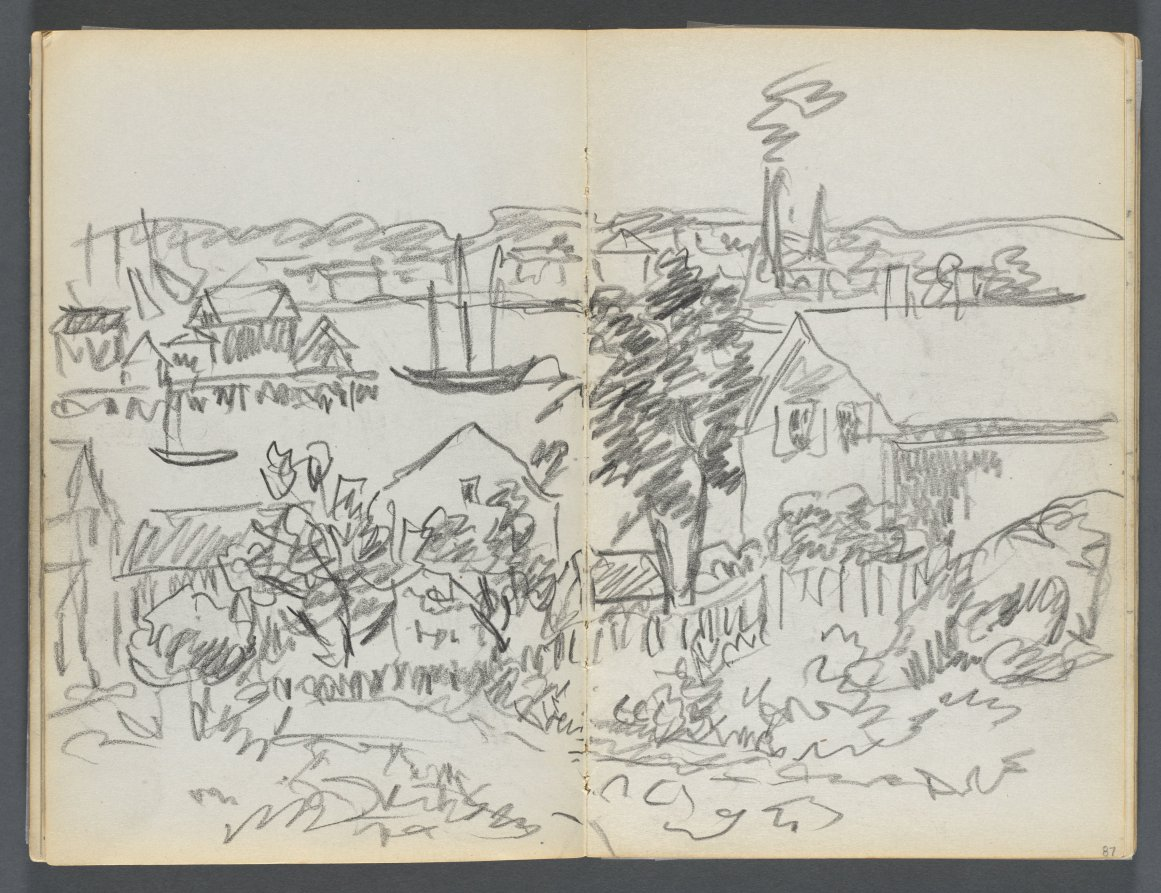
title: Sketchbook, The Dells, N° 127, page 086 & 87: Harbor View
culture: America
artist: Maurice Prendergast (American, born Newfoundland [now Canada], 1858–1924)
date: c. 1919–1921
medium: graphite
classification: Bound Volume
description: This sketchbook contains 59 pages of graphite drawings and 16 watercolors made at various locations on Cape Ann, Massachusetts.